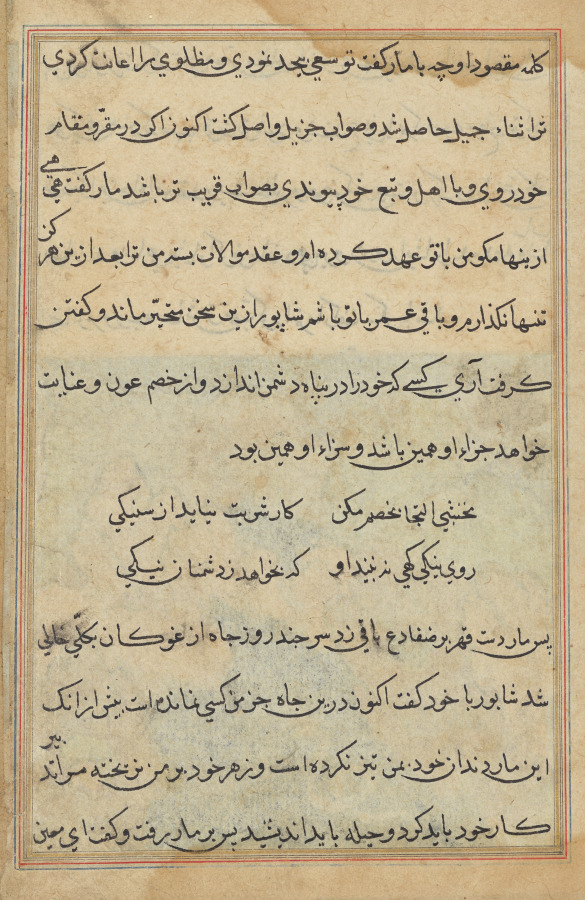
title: Page from Tales of a Parrot (Tuti-nama): text page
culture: Mughal India, court of Akbar (reigned 1556–1605)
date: c. 1560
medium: gum tempera, ink, and gold on paper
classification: Painting